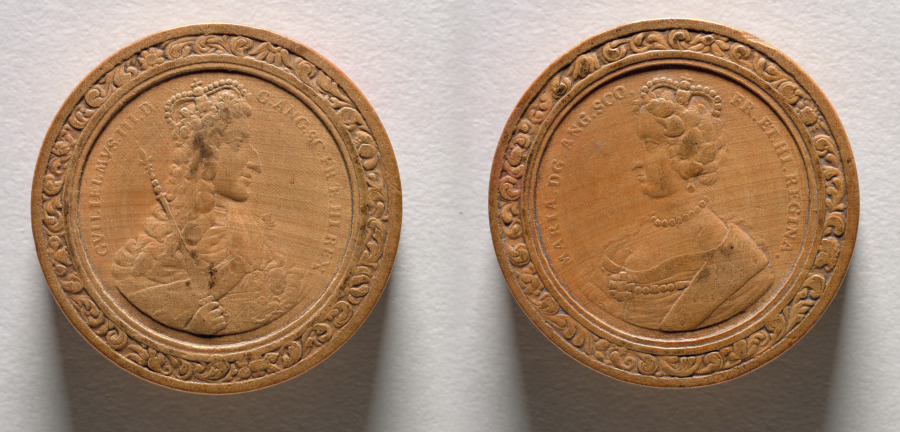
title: Gaming Piece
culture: Germany, late 17th-early 18th Century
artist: Martin Brunner (German, 1659–1725)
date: c.1700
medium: wood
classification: Furniture and woodwork